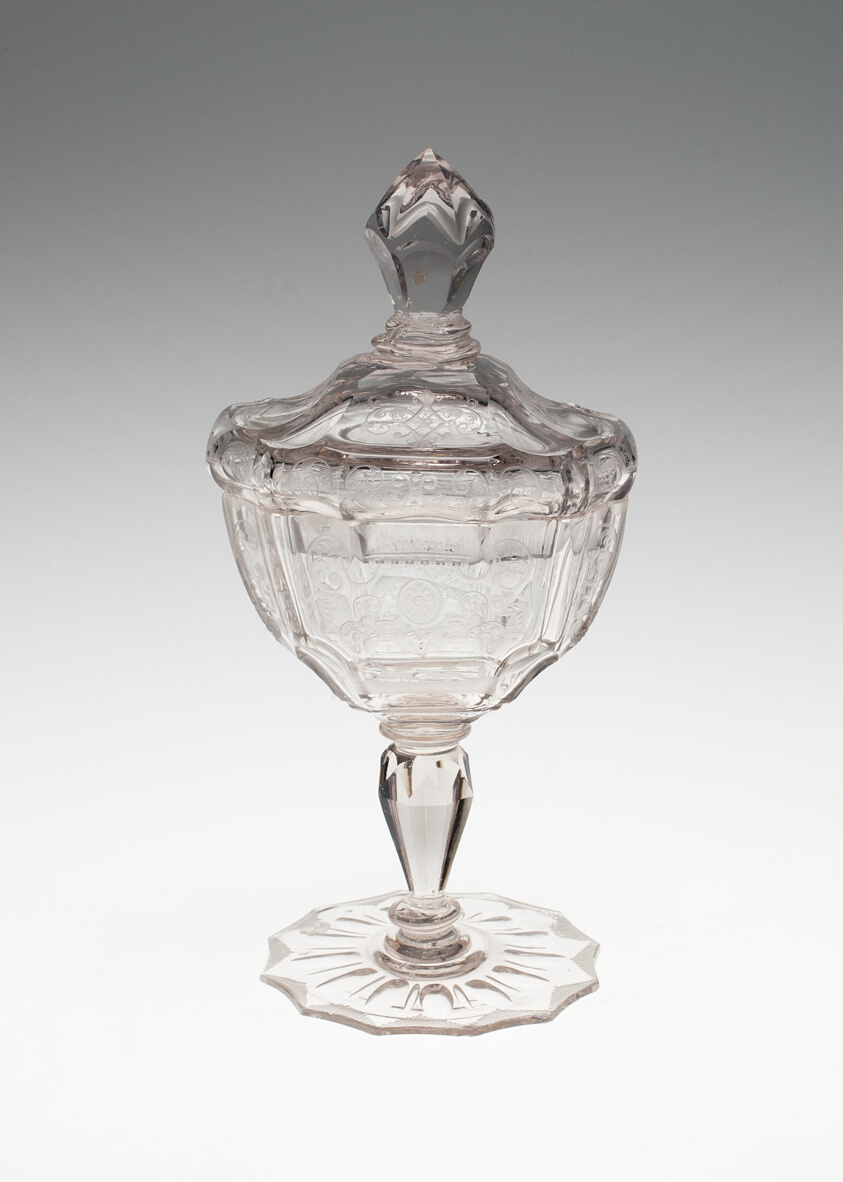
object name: Glass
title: Covered Bowl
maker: Germany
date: c. 1730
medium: Glass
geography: Germany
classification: bowl; glass; dish (vessel); european decorative arts